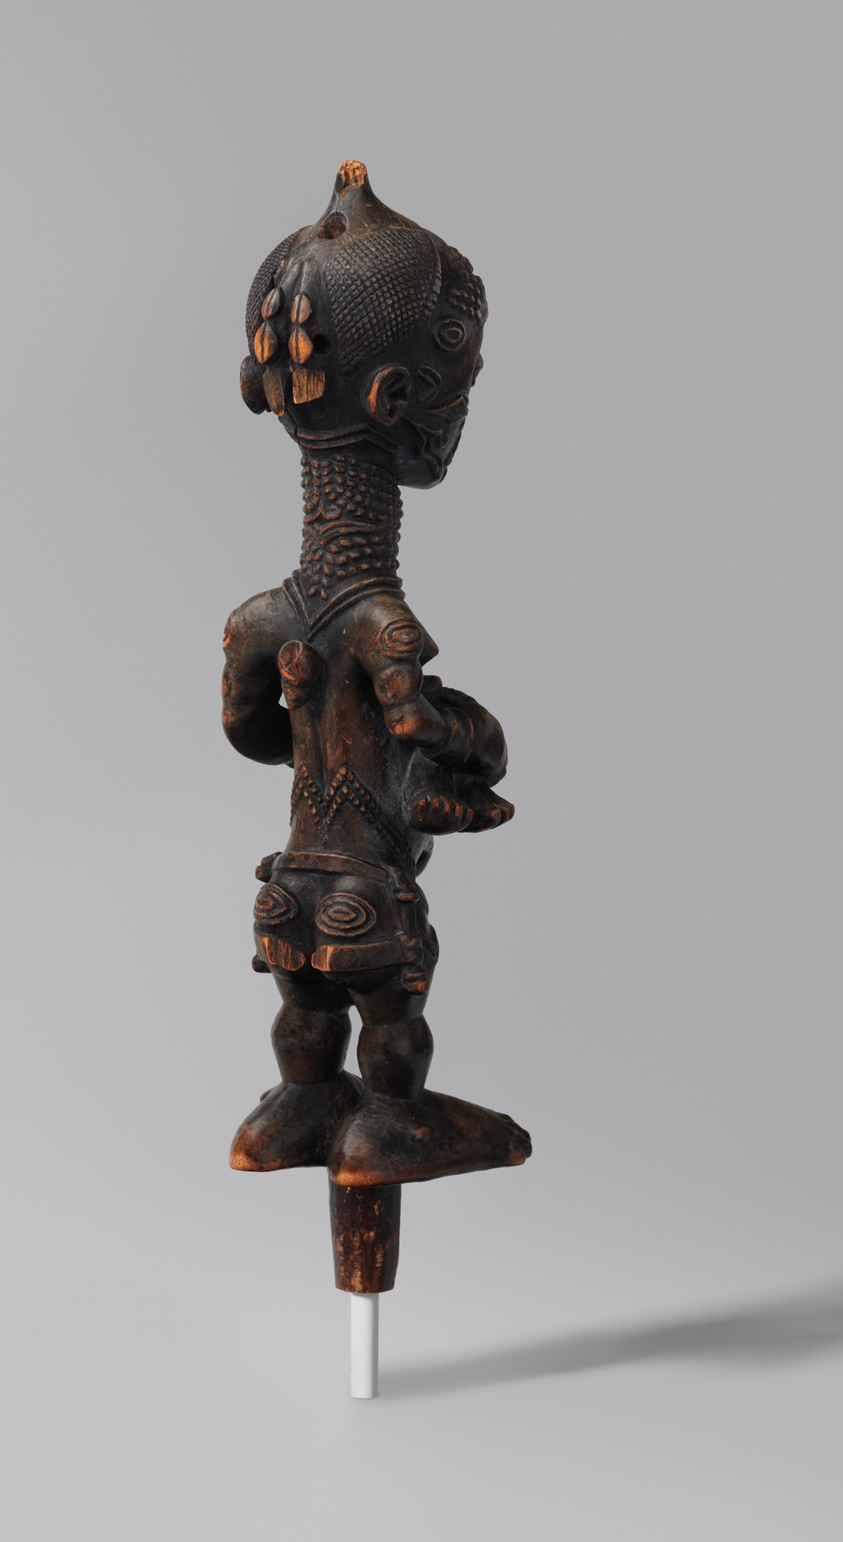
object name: Sculpture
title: Mother-and-Child Figure (Bwanga bwa Chibola)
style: luluwa, Arts of Africa, lulua, african Art, Central Africa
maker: Luluwa; Democratic Republic of the Congo; Central Africa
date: Mid–late 19th century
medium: Wood and pigment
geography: Democratic Republic of the Congo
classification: sculpture; wood; arts of Africa; african art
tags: children, mothers, containers, status, beauty, female, fertility, goodness, ritual, birth